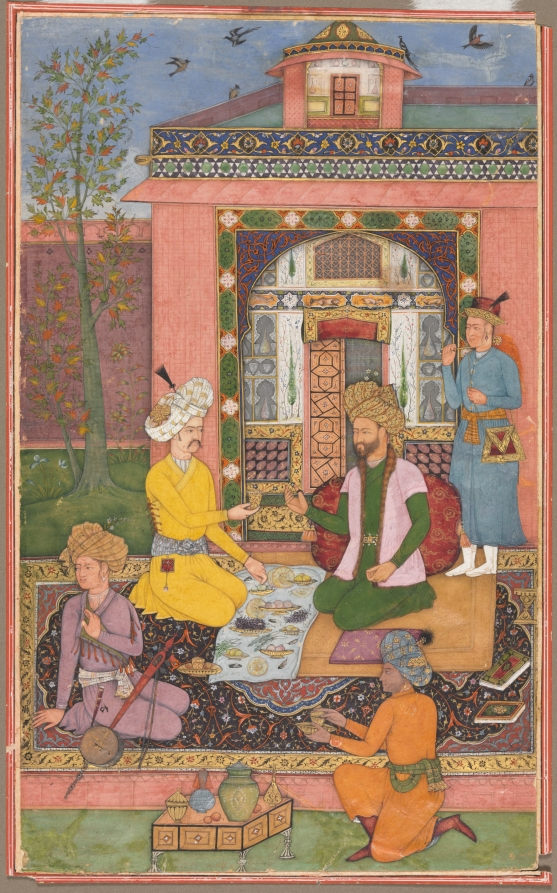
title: A Royal Picnic on a Terrace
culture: Mughal India, court of Akbar (reigned 1556–1605)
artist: attributed to Muhammad Ali (Persian, active 1590–1620)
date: c. 1620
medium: Gum tempera and gold on paper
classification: Painting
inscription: later Hindi inscription on reverse: Babur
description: A richly patterned carpet spans the width of the composition and forms the setting for a royal visit. The status of the highest-ranking person is indicated by the tan cloth placed over the carpet and the voluminous wine-colored cushion ornamented with stylized gold clouds. An attendant holding an emblem of Indian royalty, the fly whisk, stands to one side. At the far right of the carpet are two books, indicating that they are learned men. Like the carpet, the book covers have central medallions and borders, in line with the Persian aesthetic that the Mughals of India held in high regard.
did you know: A gentleman connoisseur has tucked a flowering sprig into his voluminous turban.